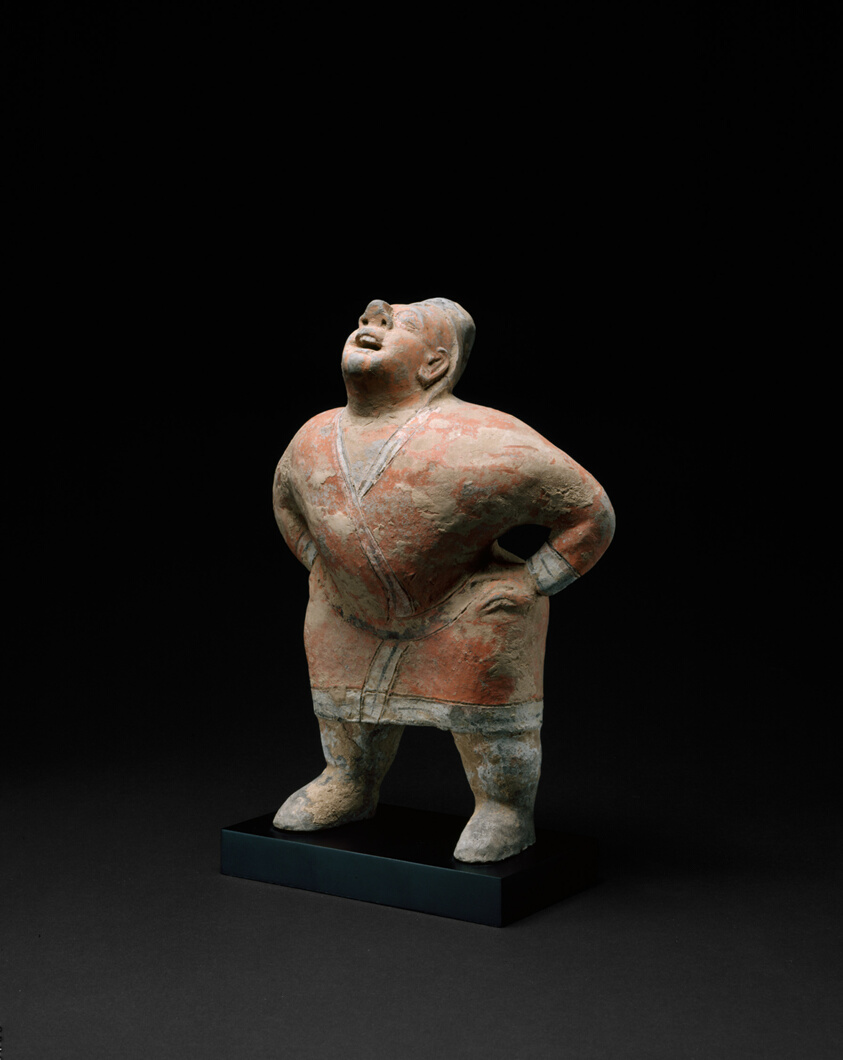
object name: Sculpture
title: Entertainer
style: Chinese (culture or style)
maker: China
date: Northern dynasties, 6th century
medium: Buff earthenware with pigment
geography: China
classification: earthenware; ceramics; sculpture; asian art